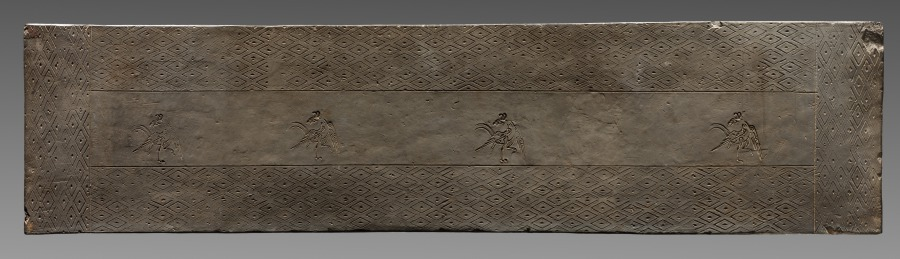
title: Tomb Tile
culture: China, Henan province, Jincun, Eastern Zhou dynasty (770–256 BCE)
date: 771–256 BCE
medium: earthenware with stamped decoration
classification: Ceramic